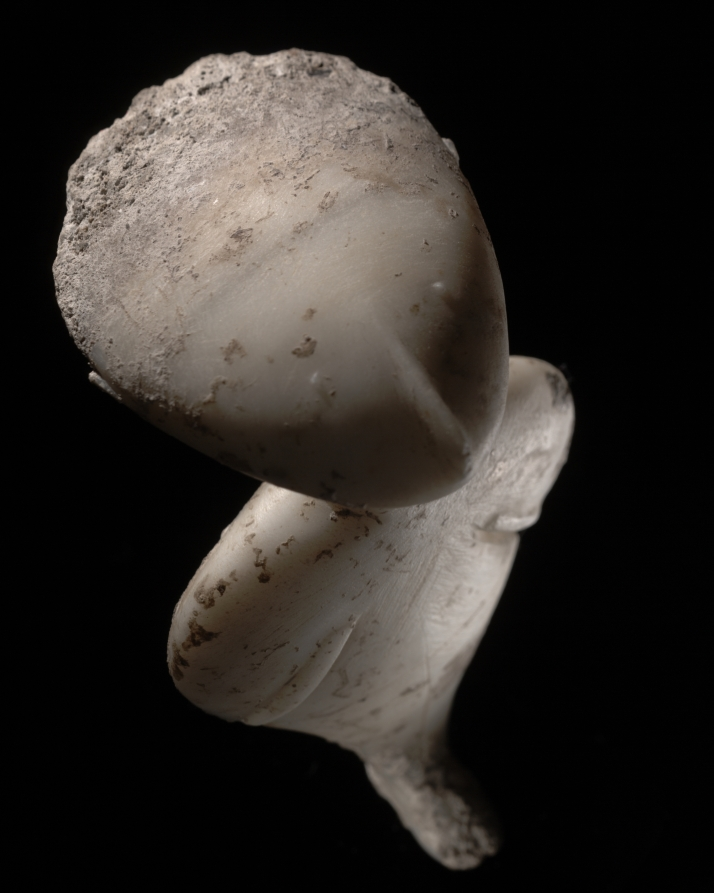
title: Statuette of a Woman: "The Stargazer"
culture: Western Anatolia, early Bronze Age (c. 3300–1200 BCE)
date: c. 3000 BCE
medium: marble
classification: Sculpture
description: "The Stargazer" moniker was given to this diminutive marble sculpture because its upturned head looks toward the heavens. Details carved into the stone are visible while painted features have been lost to time. We do not know how this object was used, but its enigmatic nature invites speculation.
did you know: We can identify this mysterious figure as female by the inscribed pubic triangle below her waist.